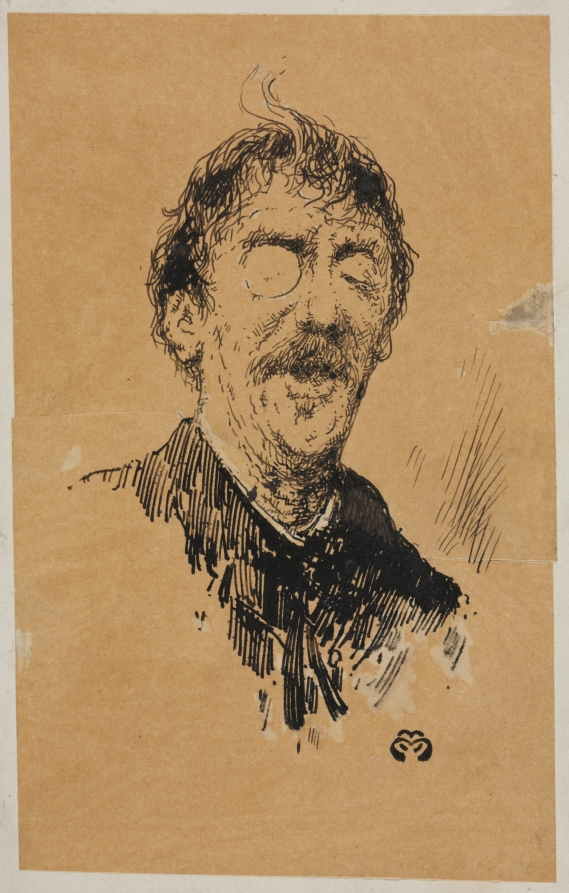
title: James MacNeill Whistler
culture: England, 19th-20th century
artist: Mortimer Menpes (British, 1860–1938)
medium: pen and ink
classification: Drawing